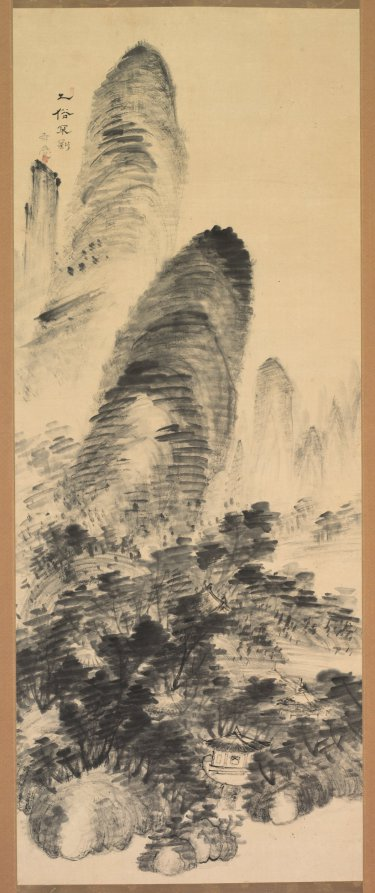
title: Forbidden to the Vulgar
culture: Japan, Edo period (1615–1868)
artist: Uragami Gyokudō (Japanese, 1745–1820)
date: late 1800s-early 1900s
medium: hanging scroll; ink on paper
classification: Painting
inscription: Inscriptions upper left are title and signature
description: Gyokudo painted in the Nanga style (literary men's school of painting), originally influenced by 18th-century Chinese painting. Most of his landscapes are variations on the theme of tall mountains and remote huts. Note the spontaneity of the brushstrokes and how the dry, rough ink works with the texture of the paper. Born to an ancient samurai family, Gyokudo was trained in the Chinese classics and studied painting, poetry, and the koto (kind of zither). He devoted himself to art and music, painting, drinking, and playing the koto as he wandered about the country.